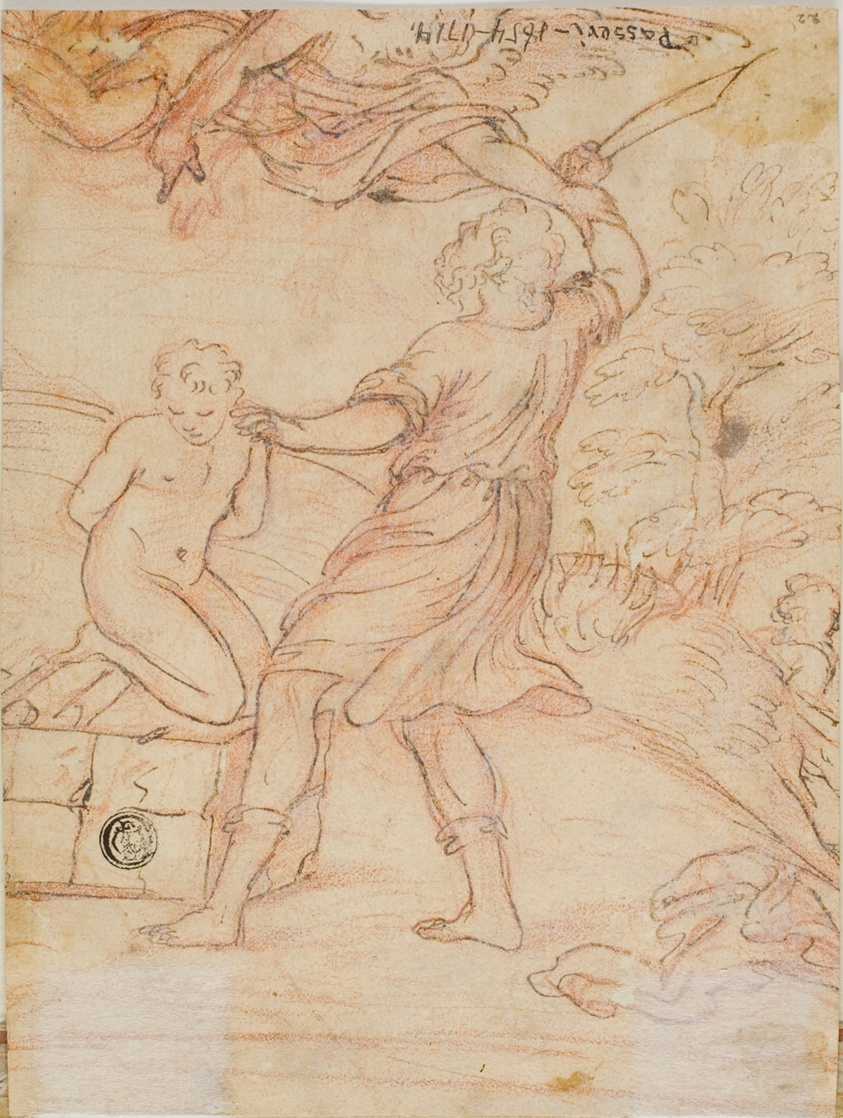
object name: Drawing and Watercolor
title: Abraham's Sacrifice (recto and verso)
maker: Attributed to Giuseppe Passeri; Italian, 1654-1714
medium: Red chalk on buff laid paper (recto) and pen and brown ink, with red chalk (verso), tipped onto cream laid paper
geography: Italy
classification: chalk; drawings (visual works); prints and drawing